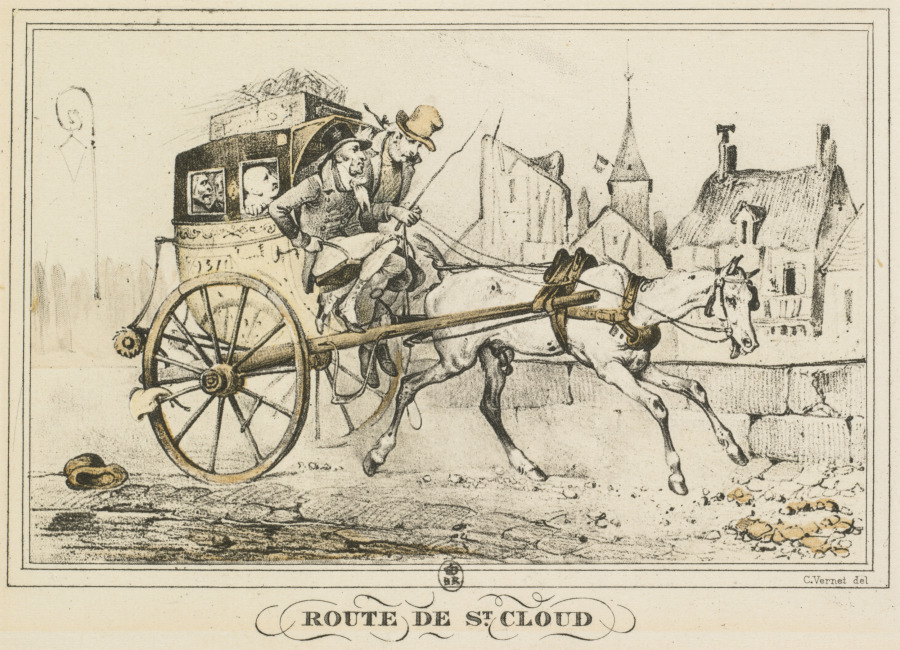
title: Scenes of Daily Life, Roads and Paths: Road to Saint-Cloud (Scènes de la vie quotidienne, Route et Chemins: Route de Saint-Cloud)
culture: France, 19th century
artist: Carle Vernet (French, 1758–1836)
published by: Bance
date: 1816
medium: lithograph gravure en couleurs a l'aquantinte par Debucourt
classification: Print